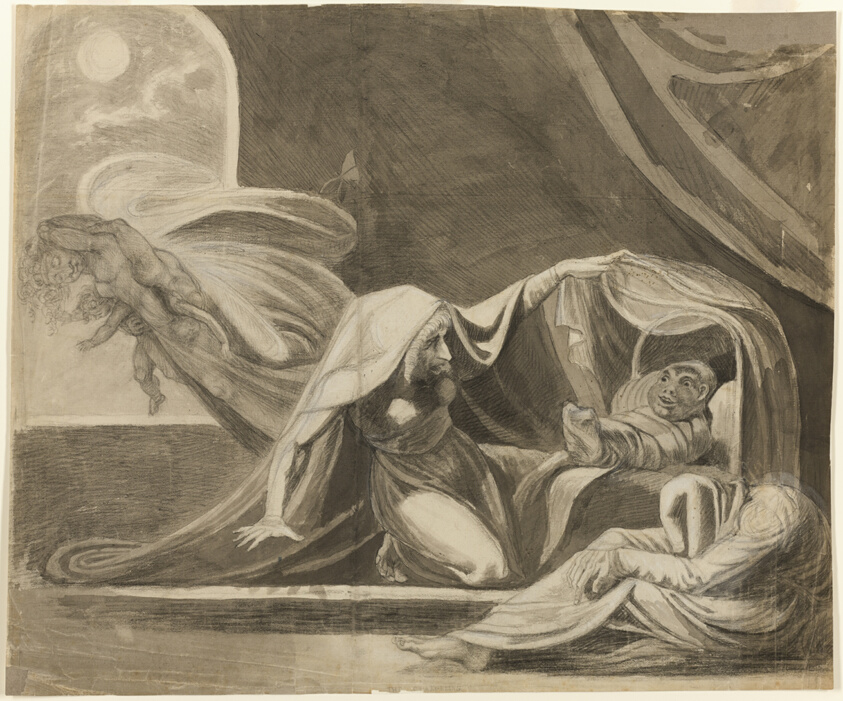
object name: Drawing and Watercolor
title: The Changeling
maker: Attributed to Henry Fuseli; Swiss, active in England, 1741-1825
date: c. 1780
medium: Charcoal and brush and gray wash, heightened with touches of white gouache, over traces of graphite, on ivory laid paper, laid down on white tissue paper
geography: England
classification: charcoal; drawings (visual works); prints and drawing; paper